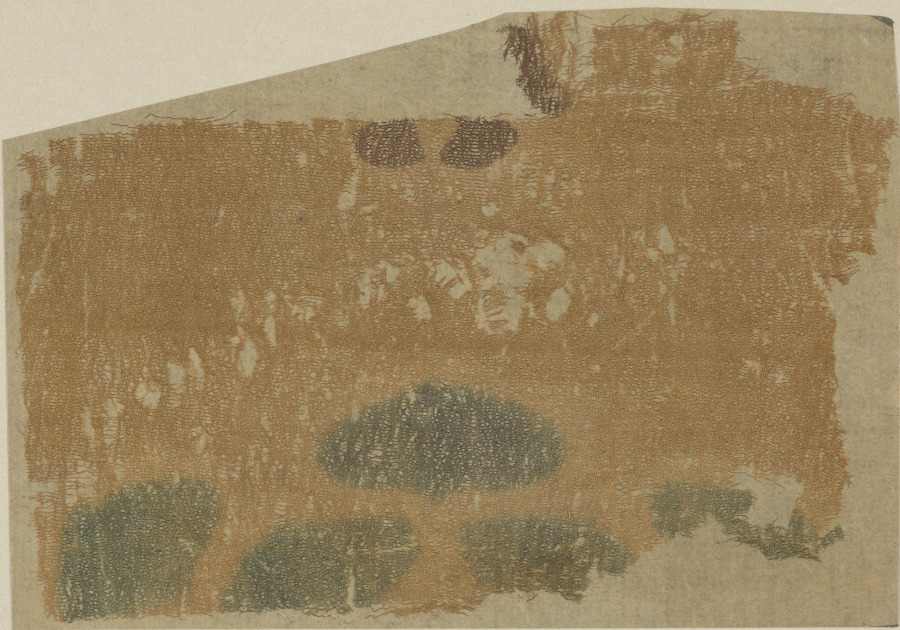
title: Fragment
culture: China or Japan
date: 700s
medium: gauze ground, resist dyed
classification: Textile